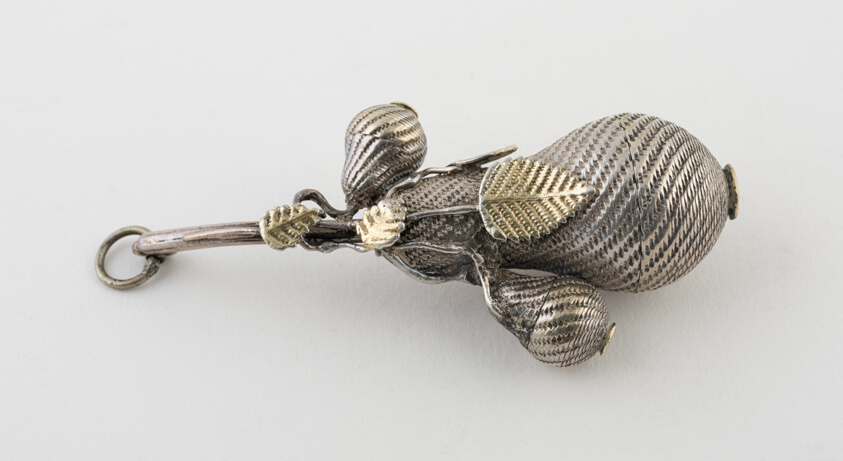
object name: Metalwork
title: Pear-Shaped Vinaigrette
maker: Continental Europe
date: c. 1840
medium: Silver and silver gilt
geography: Europe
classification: container for personal use; vinaigrette (container for health care); european decorative arts; metalwork; silver; decorative object/ornament